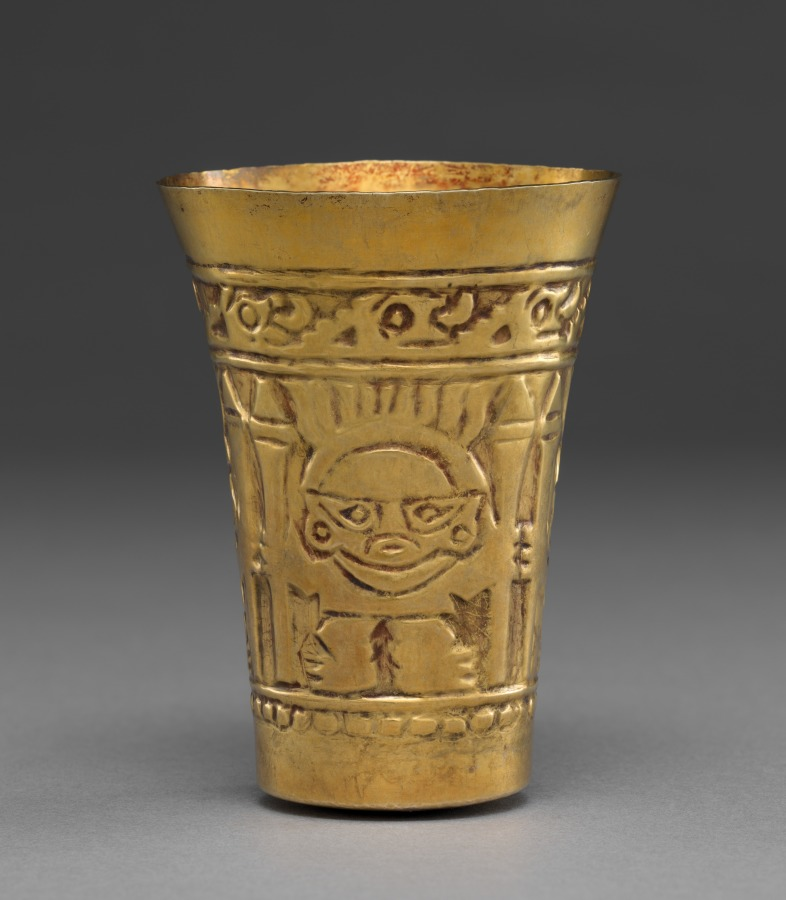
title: Beaker with Frontal Figures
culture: Central Andes (Peru), Lambayeque (Sicán) people, 10th century-12th century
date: 900–1100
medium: gold, hammered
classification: Metalwork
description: This beaker was created by an artist of the Lambayeque culture of Peru's north coast. It features a figure with comma-shaped eyes holding staffs, symbols of authority. If such beakers were used in life—that is, not created exclusively for the lavish tombs in which they have been found in quantities—they may have figured in feasting events that were central to late pre-Hispanic political, social, and religious life.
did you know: Gold beakers like this one were indicators of high status.